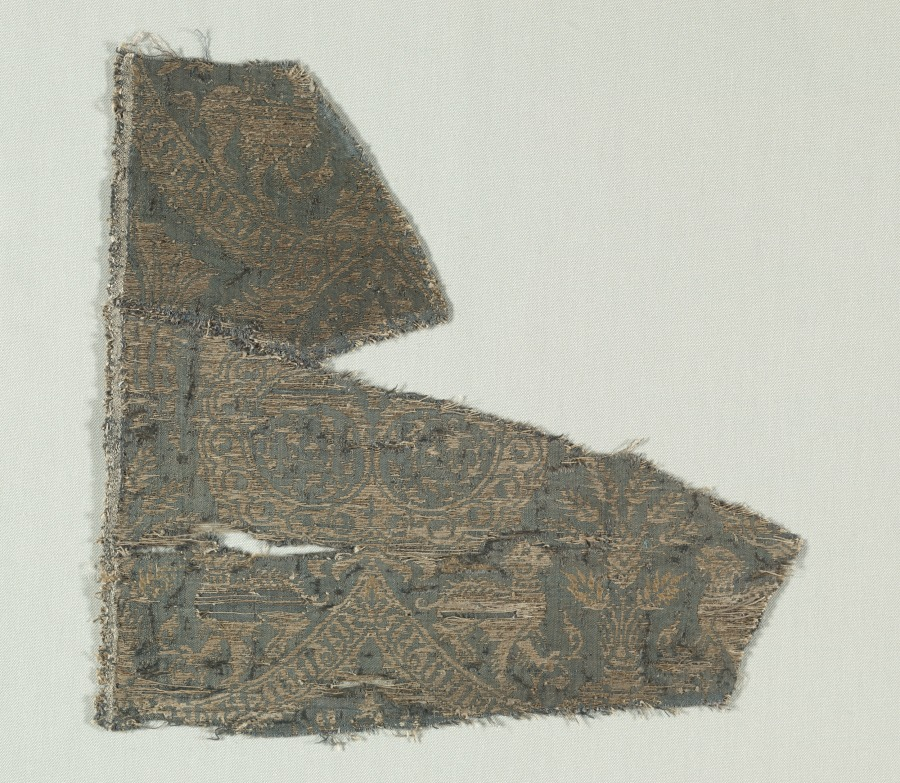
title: Silk with Dogs and Arabic Script in Swaying Bands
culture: Italy, last third of 14th century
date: 1370–1400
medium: silk and silver thread; a combination of two weaves, 2/1 twill and 1/5 twill (lampas)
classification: Textile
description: Arabic script was included in many Italian silk patterns during the 1300s and early 1400s. Usually a few unintelligible but decorative Arabic letters were repeated in the design, but here, the pseudo-Arabic script is prominently displayed in the scalloped bands that support trefoil palmettes. Dogs and birds are incorporated into the pattern in an Italian fashion. During the 1300s and 1400s, Arabic script was featured in luxurious silks woven in Islamic territories, where it symbolized royal power. Spain, Egypt, and to a lesser extent the former Islamic territory of Sicily all produced examples that could have influenced the international silk style created by Italian silk designers. In addition, weavers may also have reinforced the fashion; they migrated from Sicily to the silk-weaving city of Lucca and subsequently to Venice. In Italian painting, pseudo-Arabic script not only decorated the border of the Virgin's mantle, but it was also repeated in silks displayed in the backgrounds.